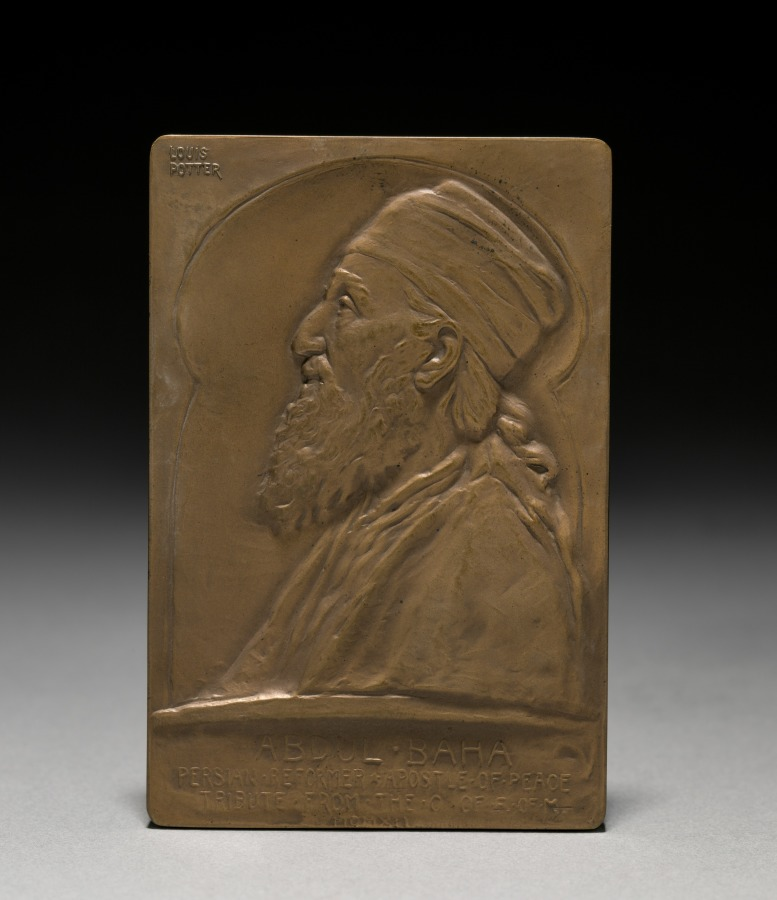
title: Medal: Abdul Baha (obverse)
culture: America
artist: Louis McClellan Potter (American, 1873–1912)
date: 1912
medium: bronze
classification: Metalwork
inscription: upper left-hand corner: "LOUIS POTTER"; below, center: "ABDUL . BAHA/ PERSIAN REFORMER. APOSTLE OF PEACE/ TRIBUTE FROM THE C. OF F. OF M./MCMXII."